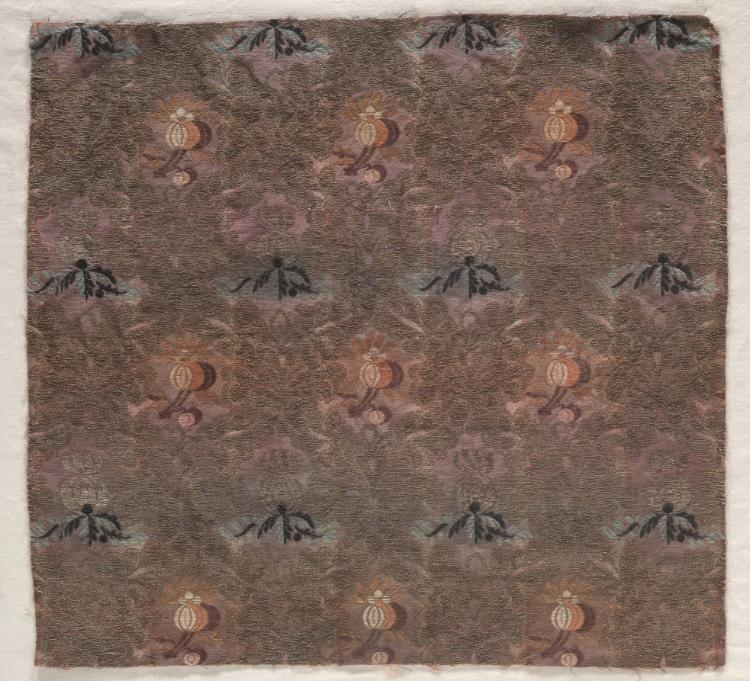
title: Brocade with Design of Fruit Sprays and Leafy Scrolls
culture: France, 19th century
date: 1800s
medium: patterned tabby weave; silk and metallic threads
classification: Textile